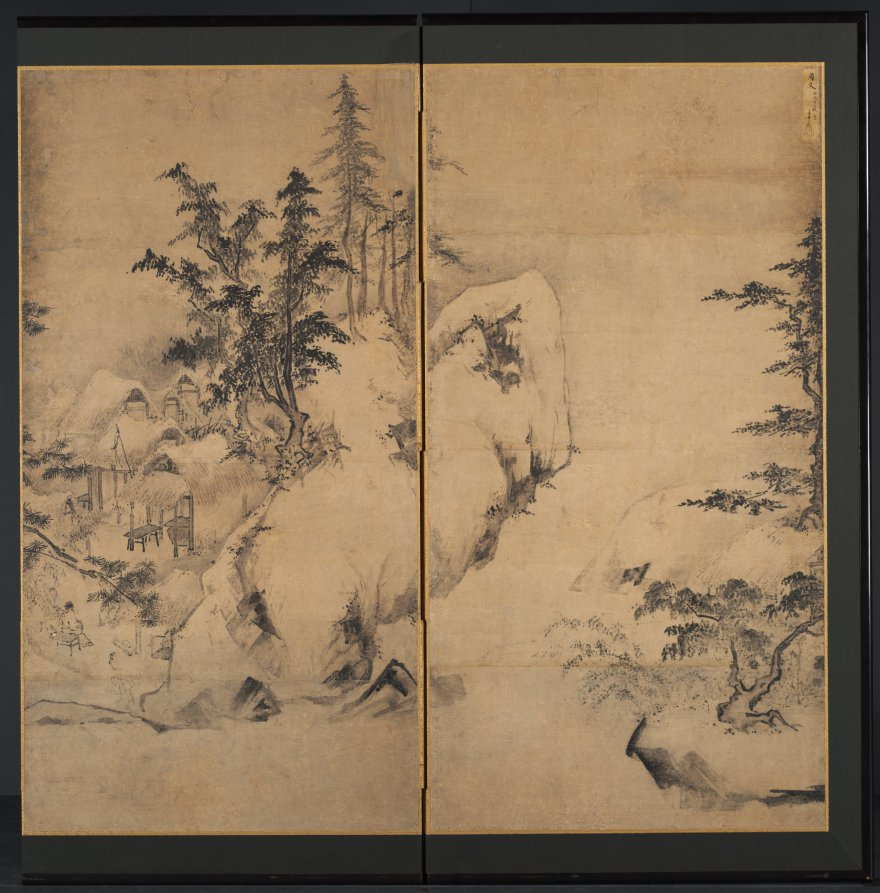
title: Winter and Spring Landscape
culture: Japan, Muromachi period (1392–1573)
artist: attributed to Tenshō Shūbun (Japanese)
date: early to mid-1400s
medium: Six-panel folding screen; ink and slight color on paper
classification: Painting